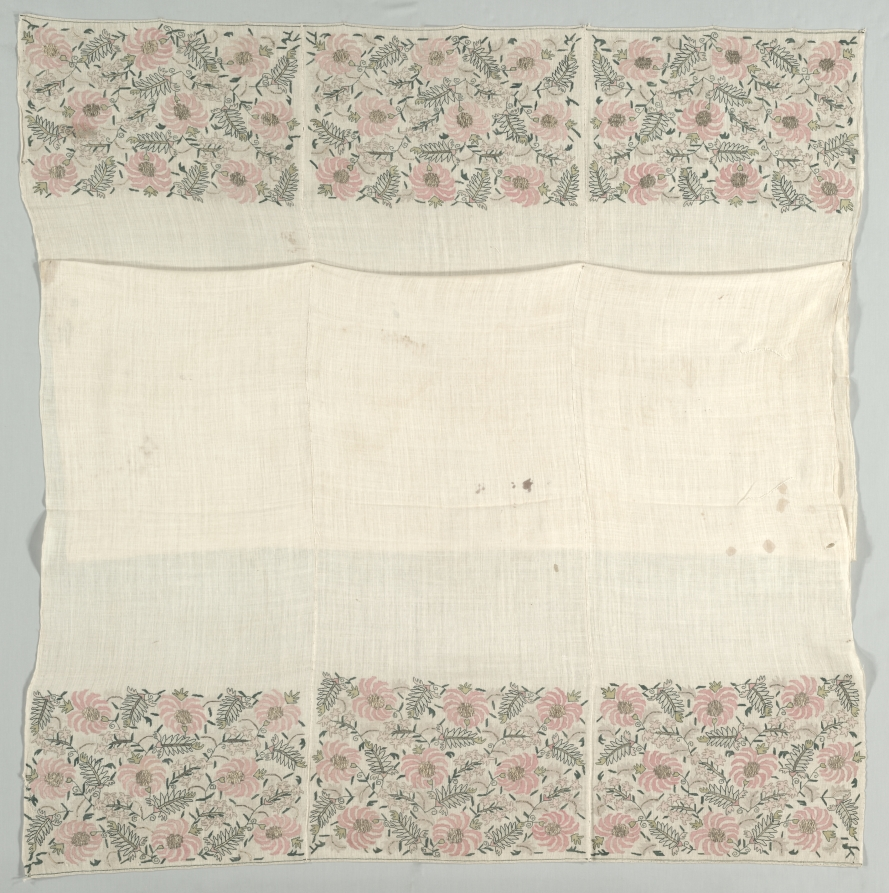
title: Embroidered Bed Spread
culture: Turkey, 18th century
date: 18th century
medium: embroidery: silk on linen tabby ground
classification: Embroidery